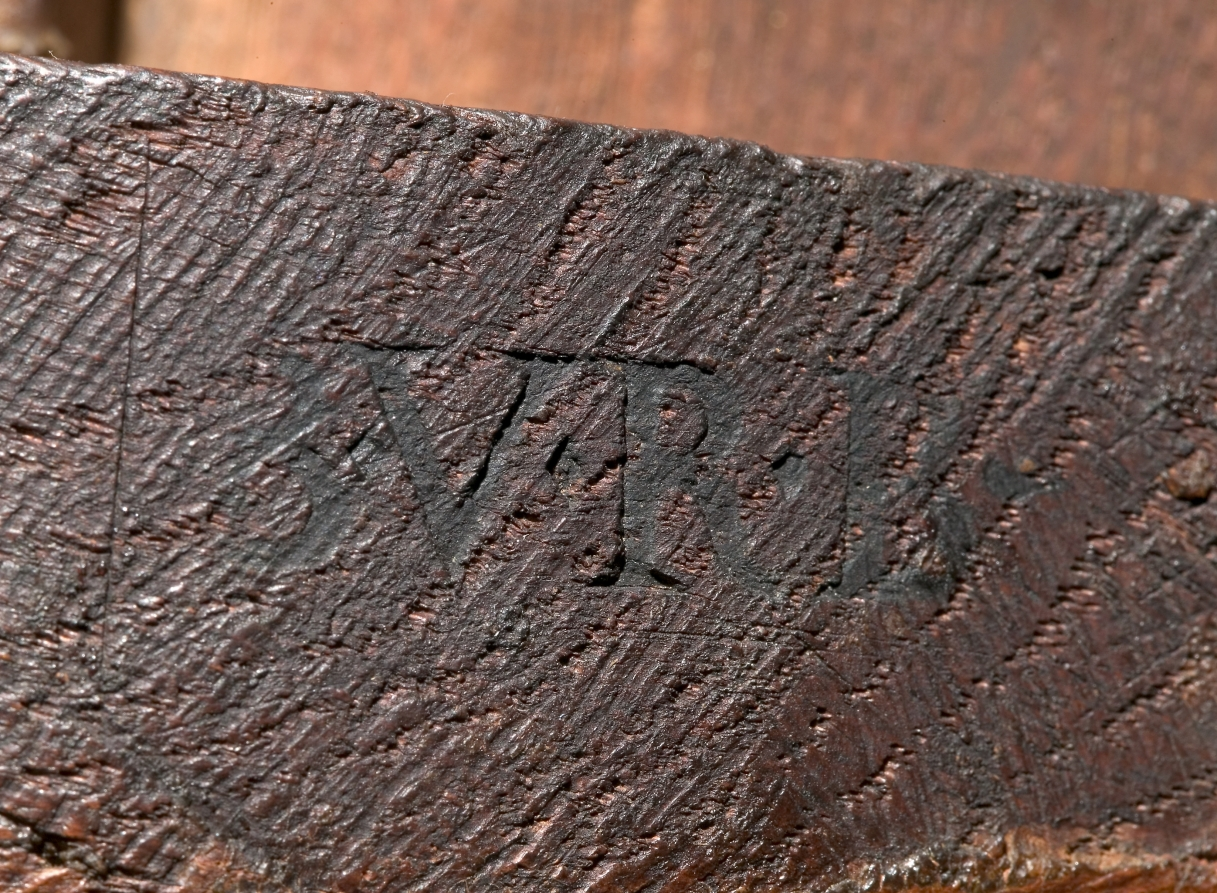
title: Table Desk (Bureau Plat)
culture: France, 18th century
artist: Bernard II van Riesen Burgh (Dutch, 1766)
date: c. 1750– 1760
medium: wood marquetry with gilt bronze mounts, leather top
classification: Furniture and woodwork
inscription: signed three times on bottom edge of apron: B. V. R. B.